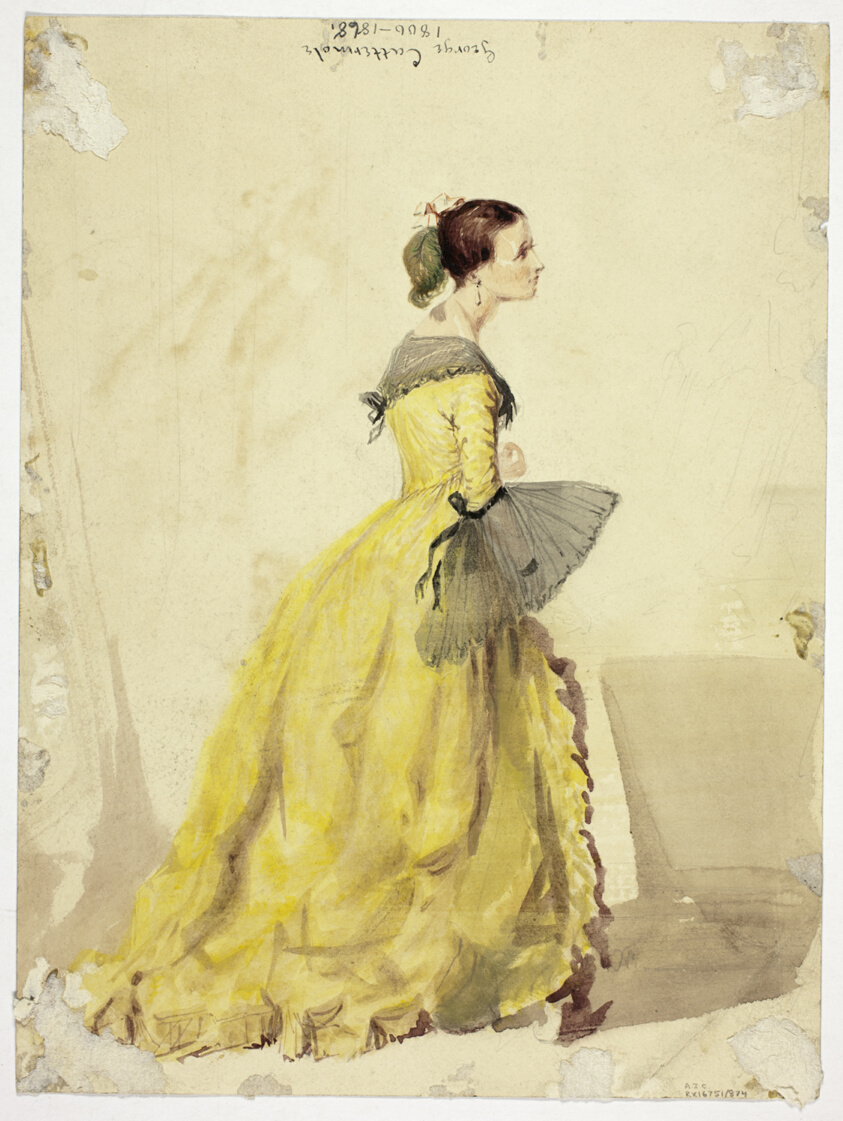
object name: Drawing and Watercolor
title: Bald Man Seated on Belongings (recto); Lady in a Yellow Gown (verso)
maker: Attributed to George Cattermole; English, 1800-1868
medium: Watercolor over traces of graphite (recto and verso), on ivory wove paper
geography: England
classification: watercolor; drawings (visual works); prints and drawing